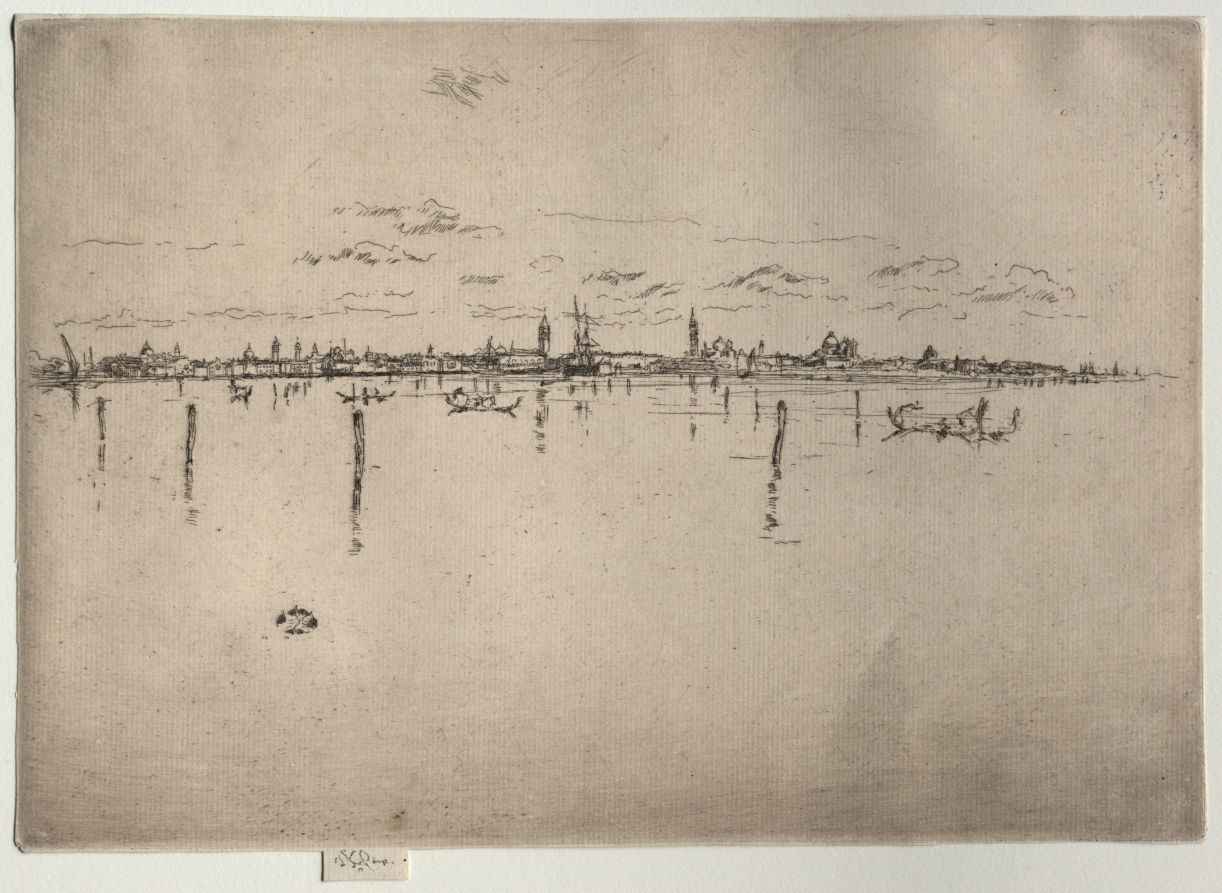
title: Little Venice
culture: America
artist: James McNeill Whistler (American, 1834–1903)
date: 1880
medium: etching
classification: Print